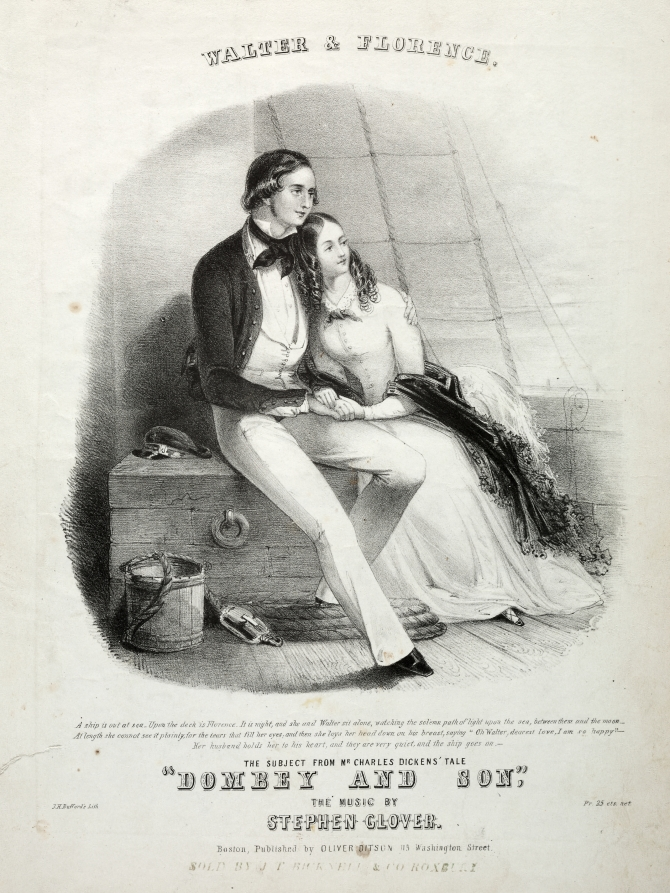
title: Walter and Florence - Sheet Music Cover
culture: America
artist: Winslow Homer (American, 1836–1910)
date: c. 1859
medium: lithograph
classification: Print